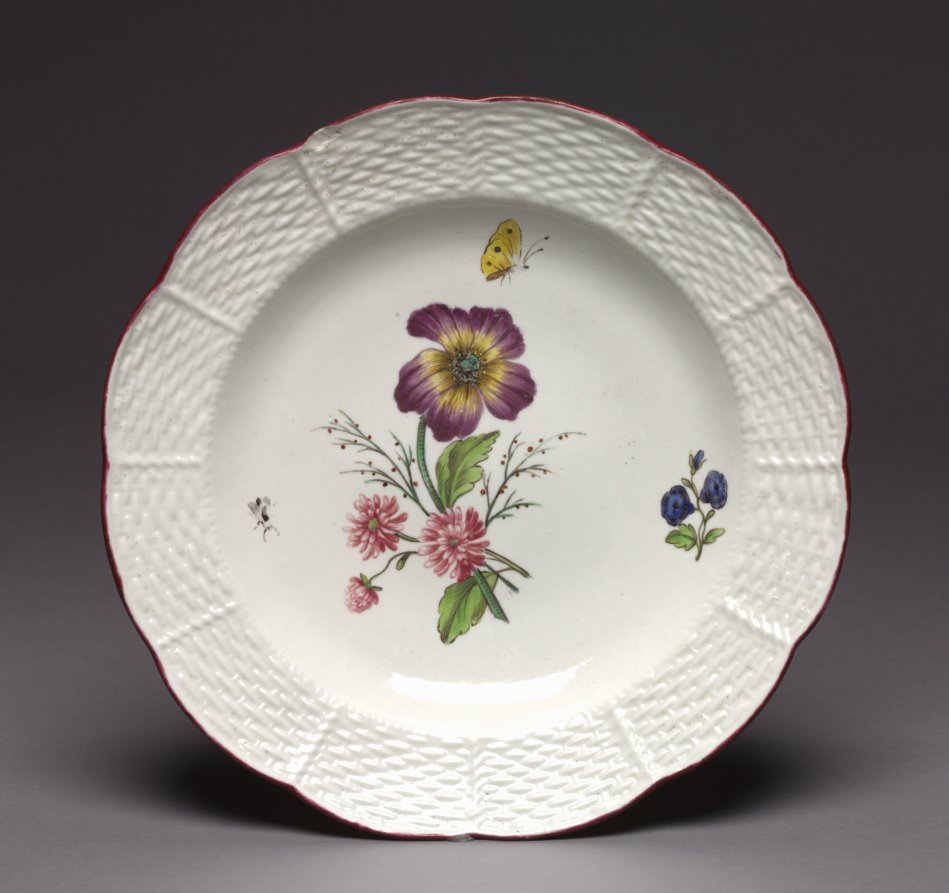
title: Plate (Assiette)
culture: France, Chantilly, 18th century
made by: Chantilly Porcelain Factory (French)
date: c. 1757–60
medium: soft-paste porcelain with enamel decoration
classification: Ceramic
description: This plate was originally part of a service owned by Don Filippo Infante, duke of Parma. Married to Marie Louise Élisabeth, the eldest daughter of Louis XV, the couple greatly patronized porcelain produced at the Chantilly factory. The basket weave border was a style inspired by models produced at the Vincennes-Sèvres porcelain factory which was, in turn, inspired by models produced at the Meissen factory in Germany.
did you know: The hatched border of this plate was likely produced by engine-turning, a process by which clay is turned on a rotating tool to produce fluted, geometric, and diced patterns.